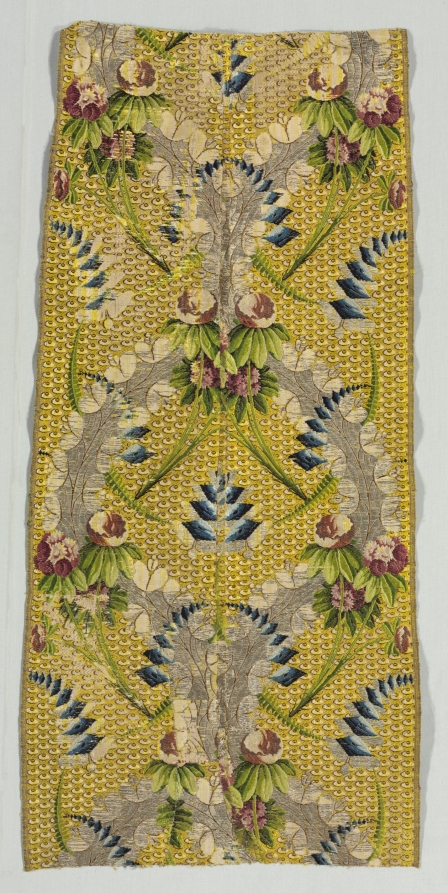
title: Fragment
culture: Spain ?, 18th century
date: 18th century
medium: brocaded silk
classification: Textile